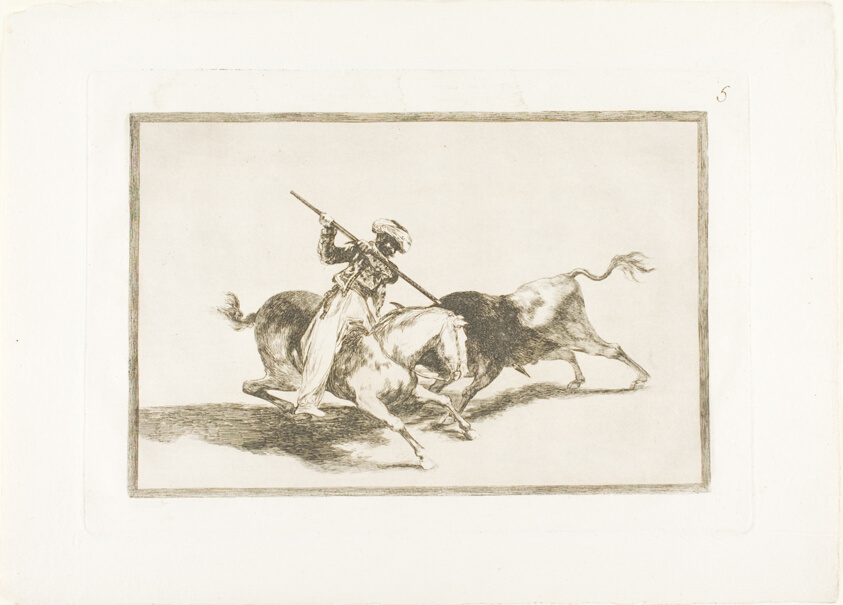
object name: Print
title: The Spirited Moor Gazul is the First to Spear Bulls According to Rules, plate five from The Art of Bullfighting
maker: Francisco José de Goya y Lucientes (Spanish, 1746-1828)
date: 1814/16, published 1816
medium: Etching, burnished aquatint and drypoint on ivory laid paper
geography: Spain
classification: etching; print; prints and drawing